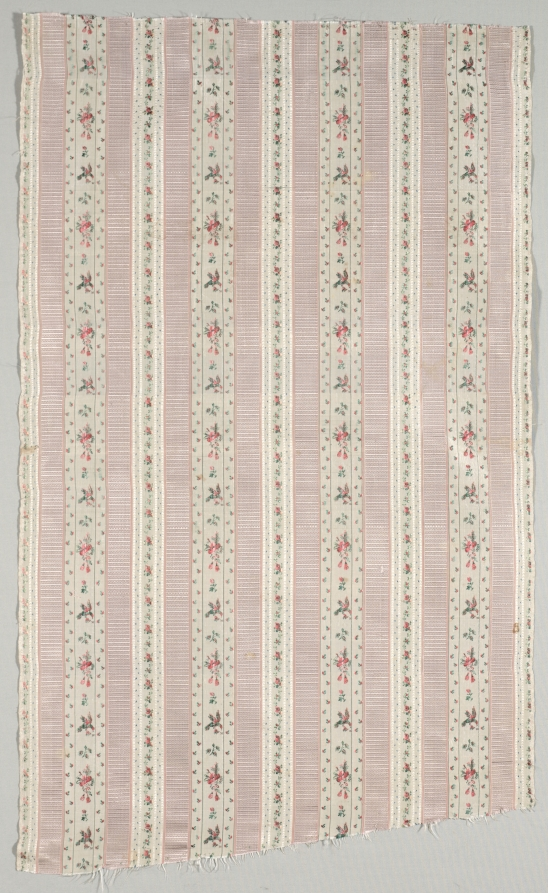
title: Length of Cloth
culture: France, 18th century, period of Louis XVI (1774-1793)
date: 1774–1793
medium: plain cloth, warp brocade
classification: Textile